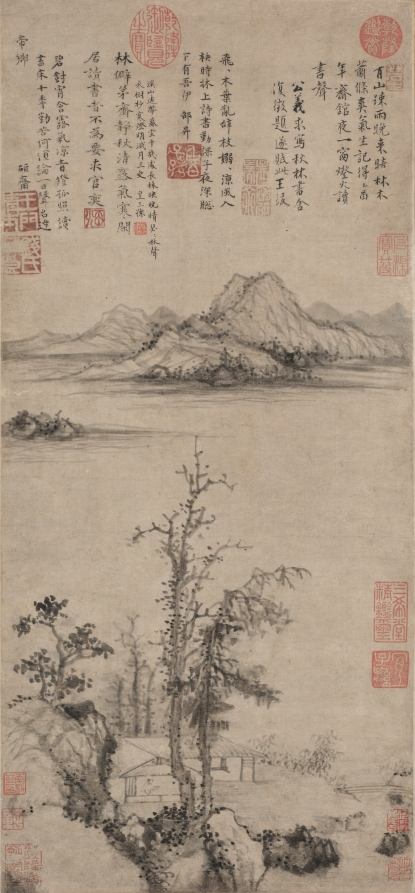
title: A Scholar's Retreat amid Autumn Trees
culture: China, Ming dynasty (1368–1644)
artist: Wang Fu (Chinese, 1362–1416)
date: c. 1403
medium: hanging scroll; ink on paper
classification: Painting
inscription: 青山疎雨晩來晴，林木蕭條爽氣生。/ 記得當年齋館夜，一窗燈火讀書聲。/ 公義求寫秋林書舍，復徵題，遂賦此。王紱 [印] 孟端; 友石生; 破研齋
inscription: 飛飛木葉亂辭枝，裊裊涼風入袂時。/ 床上詩書勤課子，夜深窗下有吾伊。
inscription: 林僻茅齋靜，秋清露氣寒。/ 閑居讀書者，不為要求官。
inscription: 碧樹宵含露氣涼，青燈孤照讀書床。/ 十年勤苦何須論，一日聲名達帝郷。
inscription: 溪山遠帶暮雲平，幾處長林映晩晴。/ 瑟瑟秋聲來樹杪，寒燈明滅月三更。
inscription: 5 seals of the Qianlong emperor (r. 1736-95); 1 seal of Tang Xun (dates unknown); 2 seals of He Zheng 何澂 (d. 1888); 3 seals of Cheng Qi 程琦 (1911–1988); 2 seals of Li Guochao 李國超 (20th century); 2 seals unidentified.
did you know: Wang Fu painted this going-away present and 3 friends added poems wishing the best for their departing friend Gongyi.